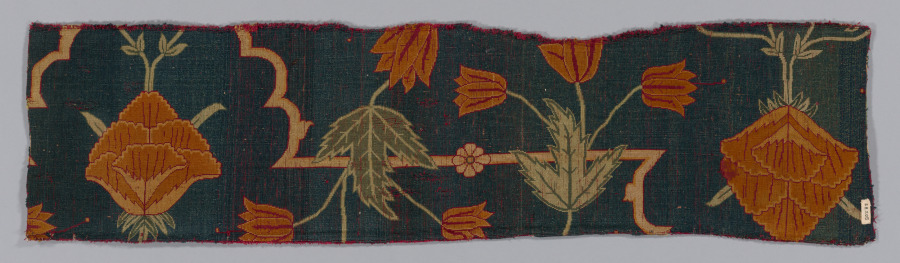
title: Fragments of a Carpet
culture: India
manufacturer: Imperial Manufactory (Indian)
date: 1600–1650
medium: silk and wool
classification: Carpet